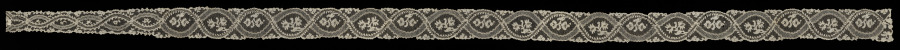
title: Lace Lappet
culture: France, Argentan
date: 1715–74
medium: Linen: needle lace (Point de Argentan)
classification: Lace